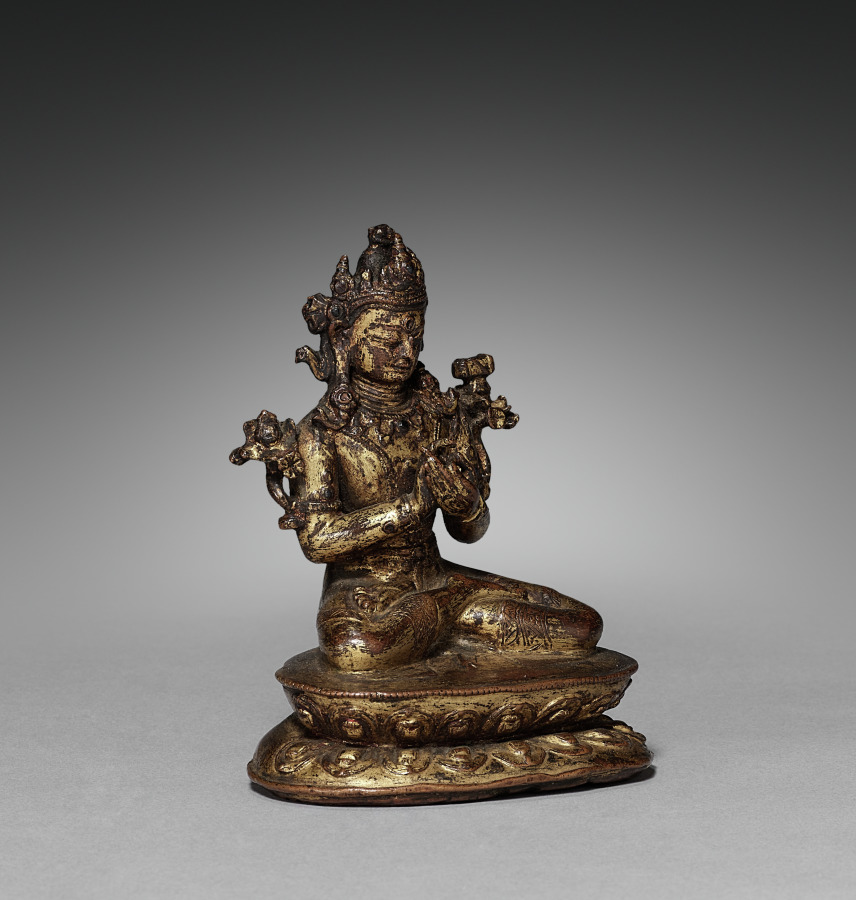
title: Manjuvara Turning the Wheel of the Law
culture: Nepal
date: 1300s–1400s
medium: gilded copper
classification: Sculpture